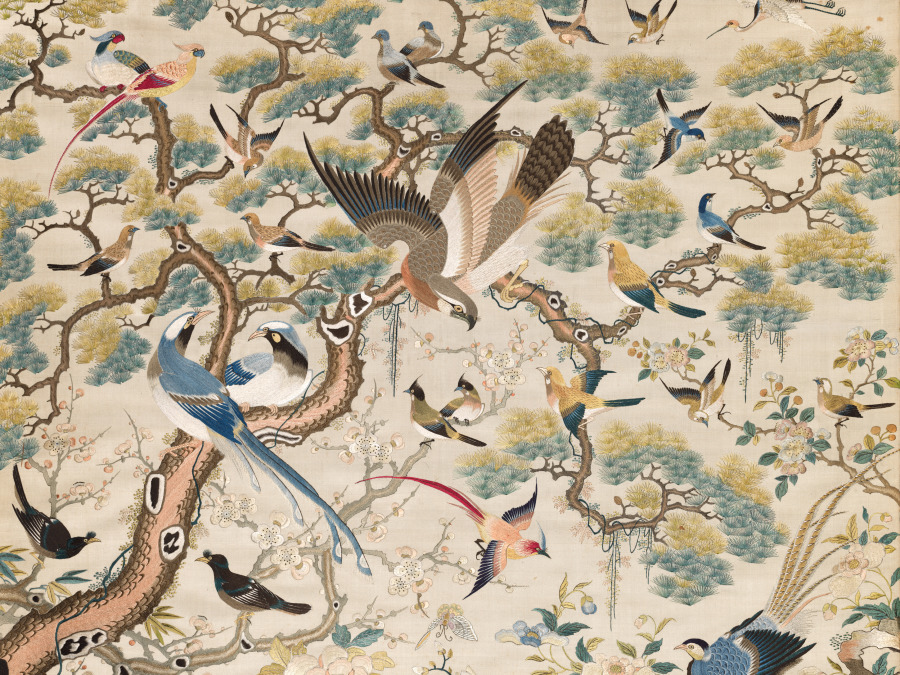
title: A Myriad of Birds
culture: China, Qing dynasty (1644–1911)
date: 1700s–1800s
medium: silk: satin weave with polychrome silk embroidery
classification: Embroidery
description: This embroidered panel, made with extremely fine silk threads, presents a lavishly detailed composition filled with fortuitous imagery. Pairs of birds, including mandarin ducks, peacocks, cranes, swallows, and pheasants, move among flowering trees, ornamental rocks, and aquatic plants, symbolizing harmony, prosperity, and longevity. Cranes stand for longevity, while a pair of mandarin ducks convey wishes for a harmonious marriage. Inspired by the decorative bird-and-flower paintings of the artist Lü Ji, the work prioritizes symbolism over spatial logic. With vibrant colors, meticulous stitching, and fortuitous meaning, the embroidery exemplifies the technical brilliance of Qing dynasty textile art, rivaling the quality of imperial production.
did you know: This magnificent textile, probably executed by a woman, demonstrates the tradition of making embroidered pictures in imitation of paintings.